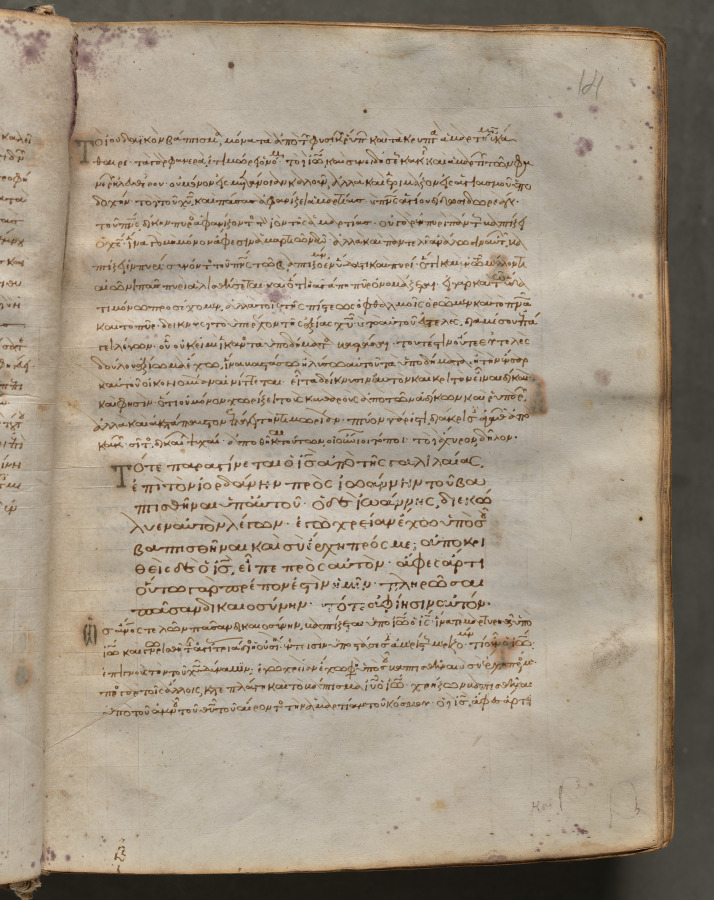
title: Text, folio 14 (recto), from a Gospel Book with Commentaries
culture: Byzantium, Constantinople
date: c. 1000–1100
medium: ink, tempera, and gold on vellum; leather binding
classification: Bound Volume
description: Each of the four gospels in this book opens on a page with brilliantly illuminated borders depicting the author of the text as well as birds-principally peacocks, symbols of the immortality of the soul-and fountains, representing the fountain of life and the salvation of the soul. This volume consists of 428 leaves with texts in Greek. Its level of sophistication suggests that it was probably written and decorated in a monastery in Constantinople.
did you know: Gospel Books were carried in procession through Byzantine churches.